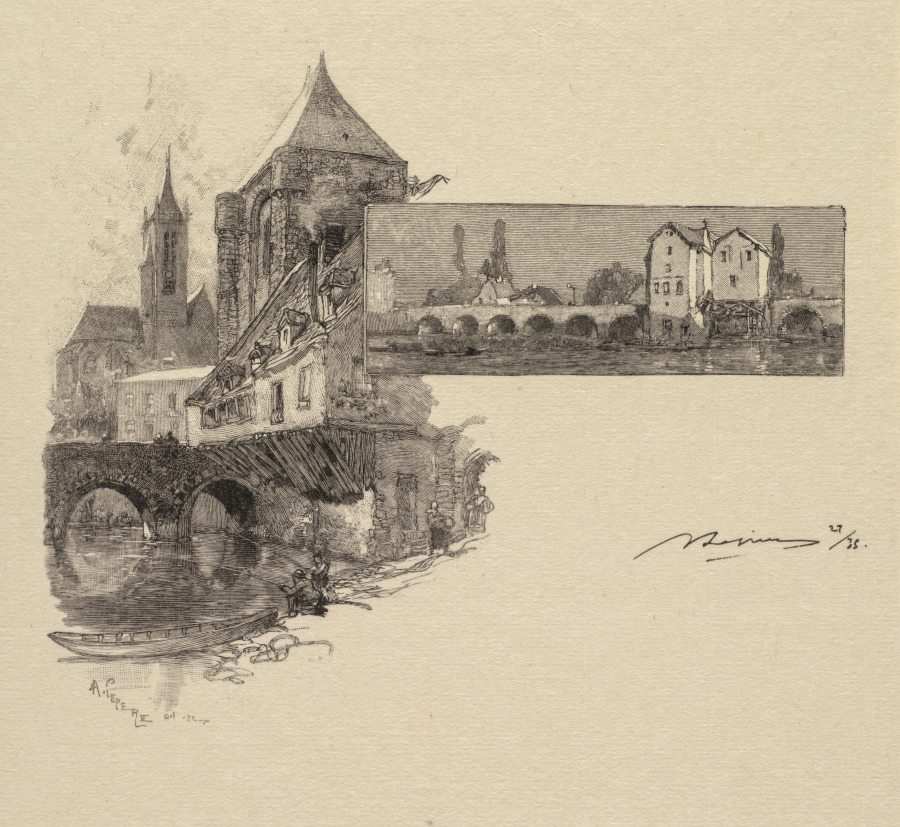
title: Fontainebleau Forest: Moret, the Wood-Mill (La Forêt de Fontainebleau: Moret, la porte de Montereau, le moulin à tan)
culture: France, 19th century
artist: Auguste Louis Lepère (French, 1849–1918)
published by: A. Desmoulins, Published in Revue Illustrée, 1887–90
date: 1890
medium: wood engraving from bound volume of 34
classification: Bound Volume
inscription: In block, left: A. LEPÈRE. Del. sc; below image, lower right, in black ink: ALepère 22/35; on window mat, lower right, in graphite Moret - Le moulin a tan